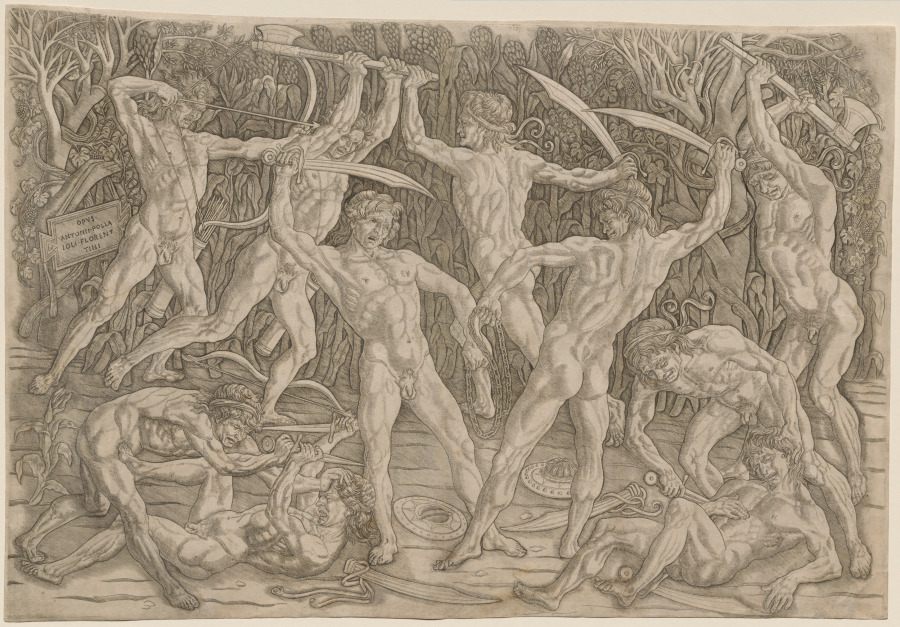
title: Battle of the Nudes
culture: Italy, 15th century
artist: Antonio del Pollaiuolo (Italian, 1431/32–1498)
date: 1470s–80s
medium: engraving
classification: Print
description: This engraving is one of the earliest Renaissance prints to portray the nude male body in action. Antonio del Pollaiuolo’s grimacing warriors appear like clones in different poses. The print may have functioned as a model for workshop apprentices studying human anatomy while learning to draw; however, the artist’s Latin signature suggests it also had an audience educated in literature. Art historians remain uncertain whether Pollaiuolo intended to depict a particular story or historical event. It is possible he created a deliberately ambiguous allegory that would appeal to patrons interested in interpreting symbols. For example, the continuous chain shared by the two central men could refer to an ancient idea that the body is the chain of the soul, only to be released in death.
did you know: Considered a groundbreaking work in the history of the Italian Renaissance, the CMA holds the only known impression of the print's first state.